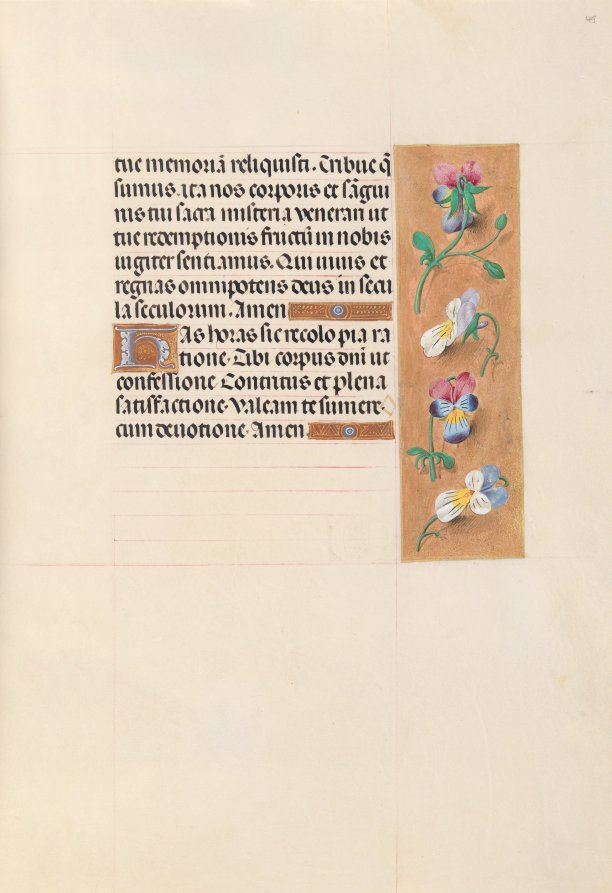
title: Hours of Queen Isabella the Catholic, Queen of Spain: Fol. 49r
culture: Flanders, Ghent and Bruges, late 15th century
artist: Master of the First Prayerbook of Maximillian (Flemish, c. 1444–1519)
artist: and Associates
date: c. 1500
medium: ink, tempera, and gold on vellum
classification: Bound Volume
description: This manuscript was illuminated by a circle of at least five highly organized manuscript painters active in the Flemish cities of Ghent and Bruges. The principal illuminator was Alexander Bening, who painted the majority of the book's miniatures. Manuscripts produced by this circle of artists are renowned for the decoration of their borders, which typically feature a rich variety of realistically-painted flowers, birds, and butterflies. This prayer book, called a book of hours, was intended not for a cleric, but for the private devotions of a lay person-in this case, Isabella the Catholic, Queen of Spain (1451-1504). Isabella's coat of arms embellishes the book's frontispiece. It is unlikely that the book was commissioned by the Queen herself; rather, she probably received it as a diplomatic gift from someone courting her patronage, perhaps Cardinal Francisco Jimenez de Cisneros. A Franciscan friar, Jimenez was dependent upon Isabella for his advancement, first to the post of Queen's confessor in 1492, and then to Archbishop of Toledo in 1495.